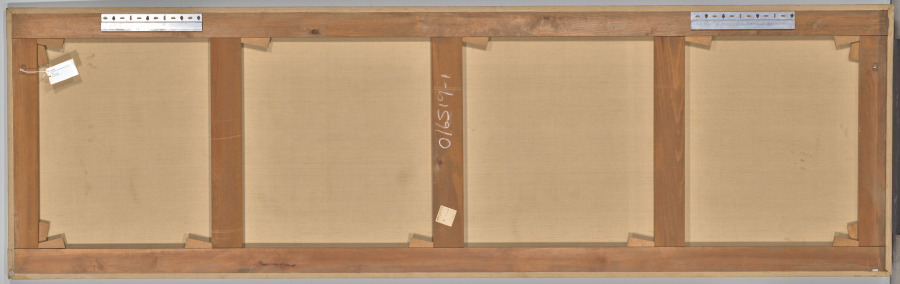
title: Raja Sansar Chand attacking Kangra Fort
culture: Northern India, Pahari kingdom of Kangra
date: after 1782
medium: Gum tempera, ink, and gold on cotton cloth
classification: Painting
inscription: Inscriptions in Takri and Persian. Persian reads: “On the 23rd of the month of Kartik, Samvat 1839 (1782 AD) Sri Maharaja Sansar Chand Bahadur attached Lakkarkot (Nagrakot ?) and the fortress of Kangra, attained victory and made siege intrenchments at the fortress of Kot Kangra.”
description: In 1782, the 17-year-old king of Kangra fought to retake his ancestral kingdom from the Mughals, who had controlled the territory since 1620. He rides a dark brown horse in front of the camel at the far right, blending in among his army and allies. The leftmost panel shows the residents of Kangra fleeing the conflict with their belongings on their heads to the safety of the fortress at the far left, from the walls where cannons are being fired. The main temple, built of gray stone, is in the middle of the composition, marked by red flags.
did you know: The king is 17 years old, beardless, riding a dark brown steed in front of the camel at the far right.